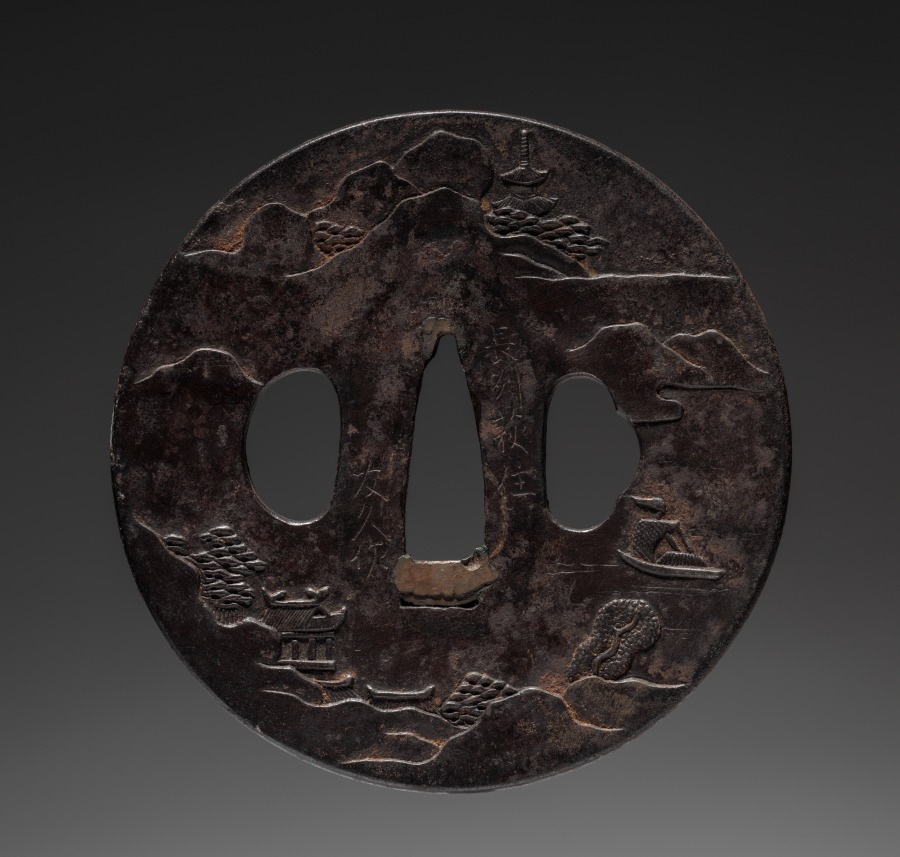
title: Sword Guard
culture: Japan, Edo period (1615–1868)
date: mid-1700s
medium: iron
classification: Arms and Armor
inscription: Signature: Tomohisa, residing at Hagi, Nagato province made